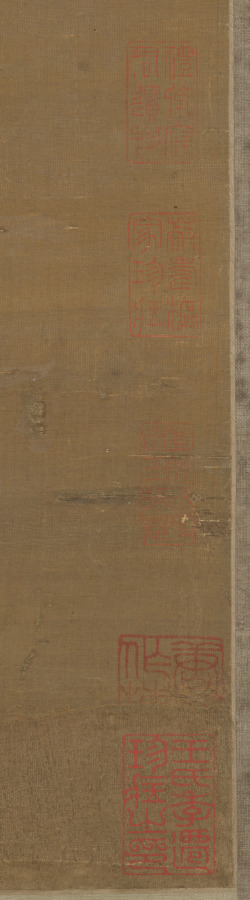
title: Xu Jingyang Moving His Family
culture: China, Ming dynasty (1368–1644)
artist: Cui Zizhong (Chinese, 1574–1644)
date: 1644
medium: Hanging scroll; ink and color on silk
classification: Painting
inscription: Artist's 2 seals: Pei-hai, Cui Zizhong yin.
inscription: 9 additional seals: 2 of Xiang Yuan (18th-19th c.); 1 of Tang Zuomei (late 18th-19th c.); 1 of Zhang Heng 張珩 (1915-1963); 1 of C. C. Wang 王季遷 (1907–2003); 4 unidentified.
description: Xu Jingyang was a dedicated fourth-century Confucian official who allegedly turned into a Daoist immortal. This scroll depicts the legend that when he attained immortality, he took his entire household, including chickens and dogs, to paradise. Cui Zizhong’s painting style intentionally referenced ancient masters. Typical of the pre-Song dynasty landscape tradition, there is the use of blue and green colors and an emphasis on outline rather than texture. While the trembling outlines are reminiscent of earlier painters, the flickering light on rocks and trees is a stylistic feature of Cui’s own time.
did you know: Xu Jingyang, wearing red, is in the upper register of figures, while below his servants transport a rooster, dog, and other supplies.